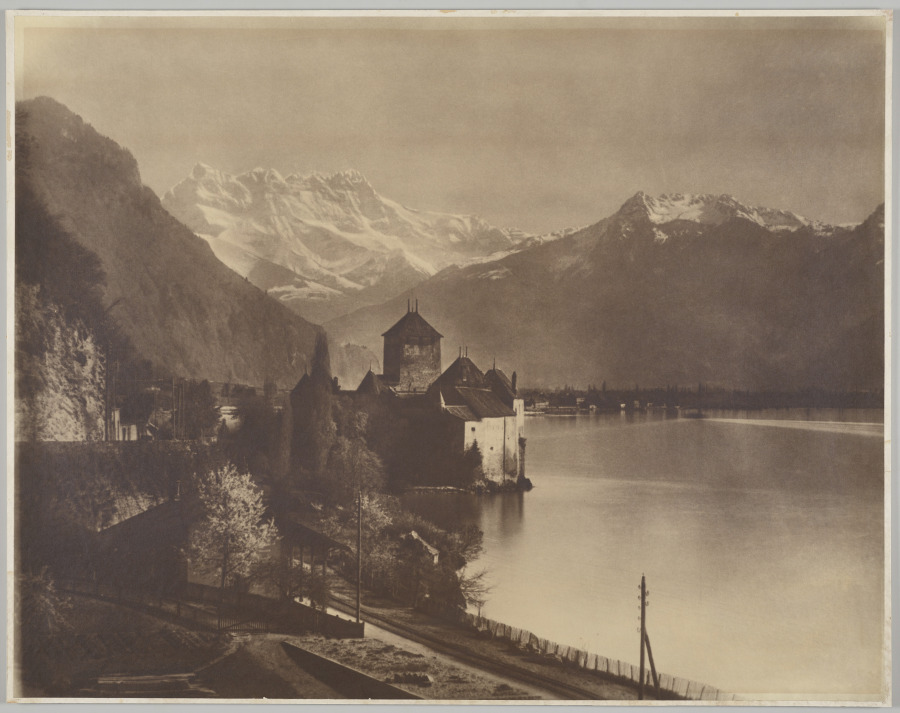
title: Château de Chillon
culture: France, 19th century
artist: Adolphe Braun (French, 1812–1877)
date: c. 1870, printed c. 1900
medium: carbon print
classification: Photograph